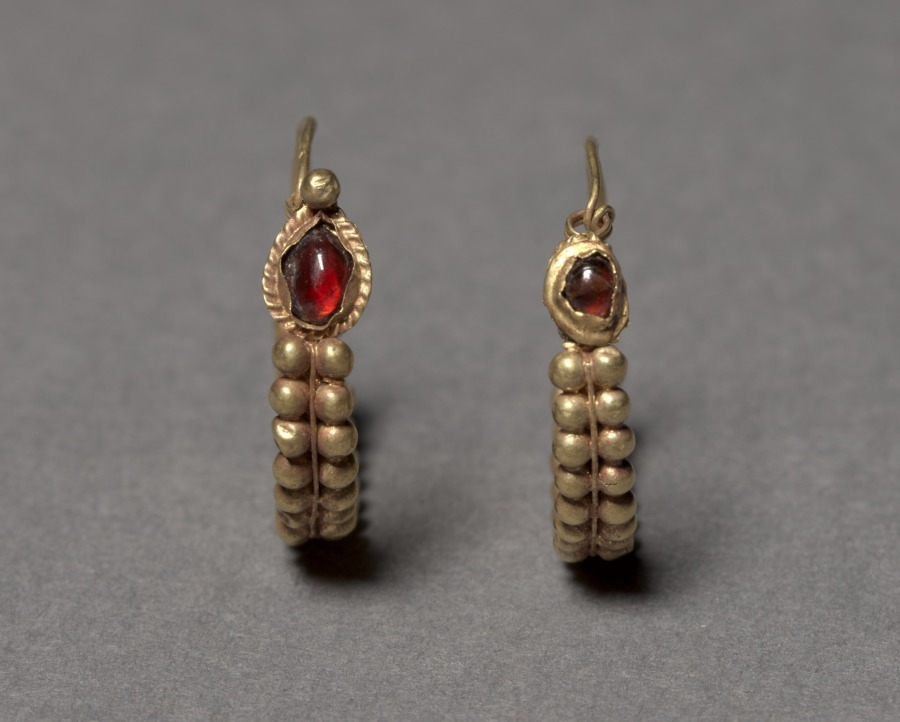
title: Earrings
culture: Syria, Roman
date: 100 BCE–100 CE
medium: gold and garnet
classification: Jewelry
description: Each of these earrings is formed from a simple hoop that ends in a hook-and-loop closure. An oval garnet is fixed below the loop on each earring; one earring has a much larger garnet, and a small ball affixed above the setting. The lower portion of each earring is decorated with two parallel rows of granules.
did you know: These two earrings are nearly identical; one lacks a gold bead above the garnet.